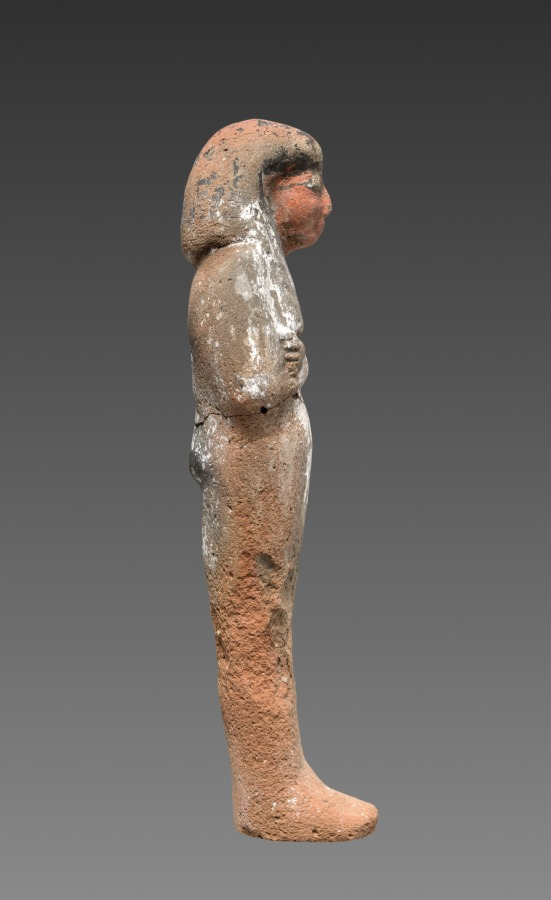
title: Shawabty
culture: Egypt, New Kingdom (1540–1069 BCE), Dynasties 19–20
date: 1295–1069 BCE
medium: terracotta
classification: Funerary Equipment